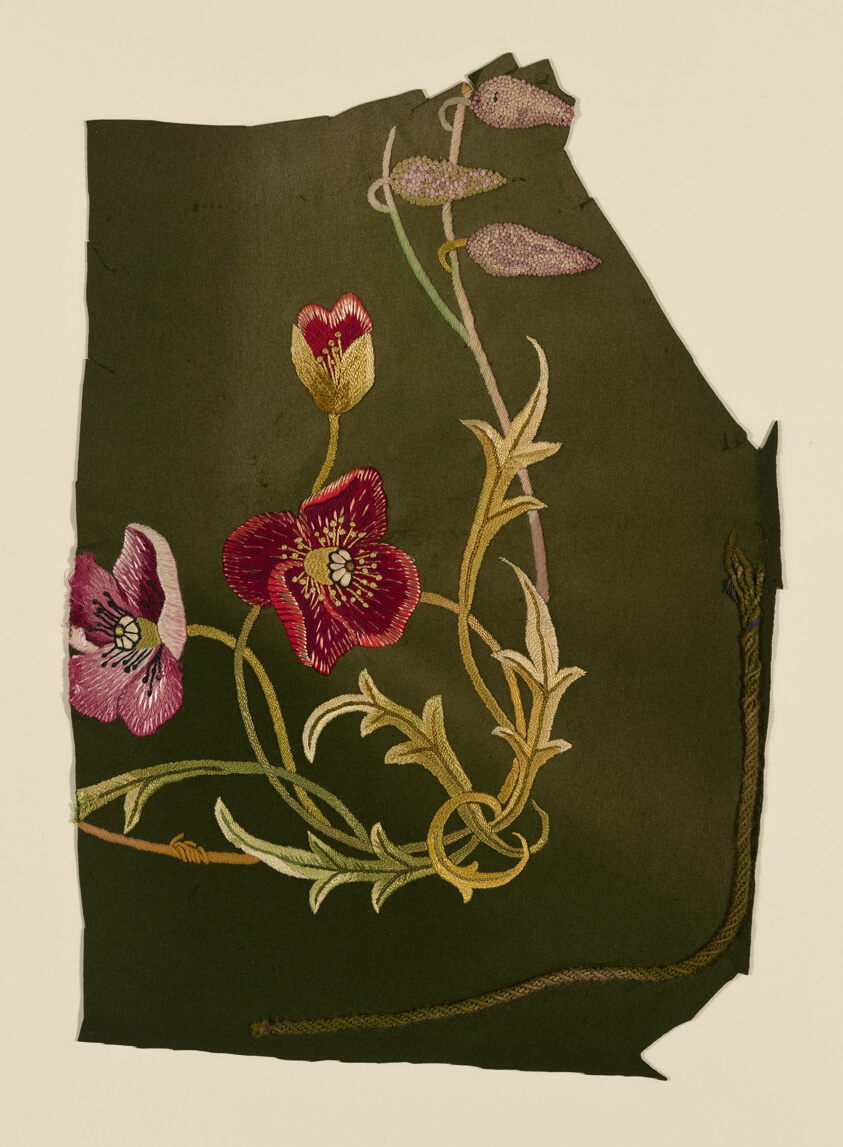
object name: Textile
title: Fragment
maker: England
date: 1850/1900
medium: Wool, felted; embroidered with wool and silk yarns in satin, single satin, and stem stitches; French knobs; edged with linen, wool, and cotton, in piled coils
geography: England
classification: textile; needlework (visual works)